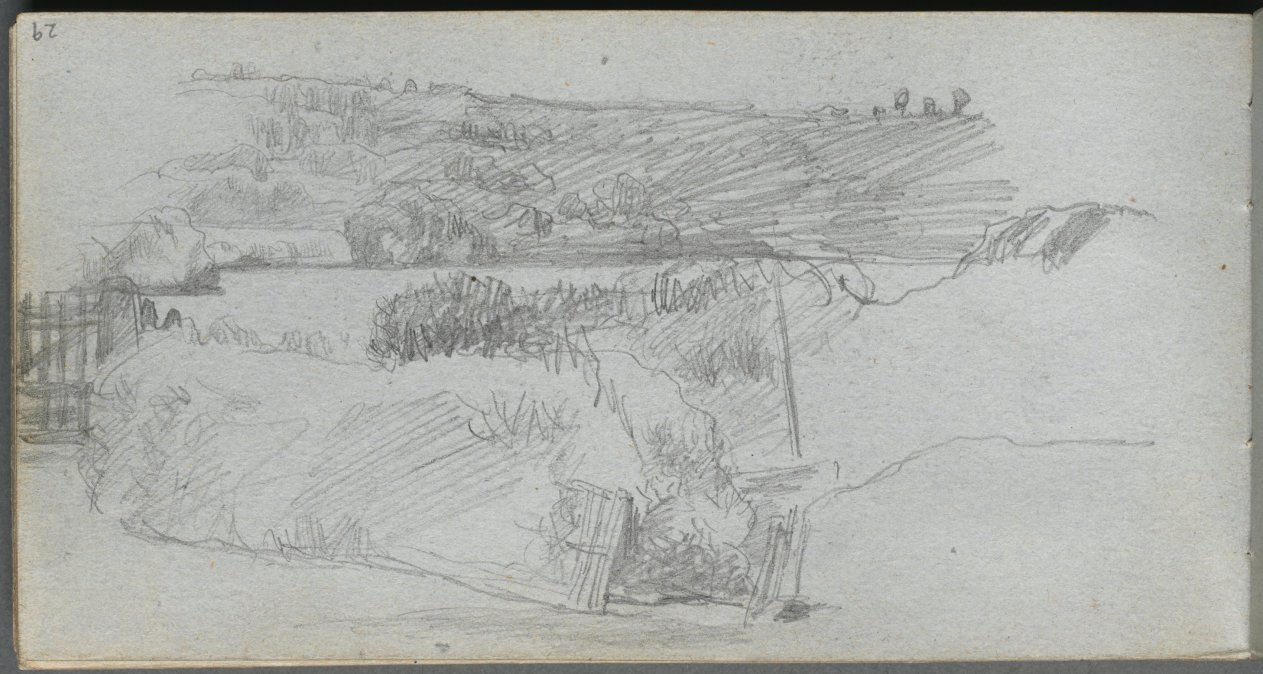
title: Sketchbook, page 29: Landscape Study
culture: France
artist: Ernest Meissonier (French, 1815–1891)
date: c. 1860s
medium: graphite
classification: Bound Volume